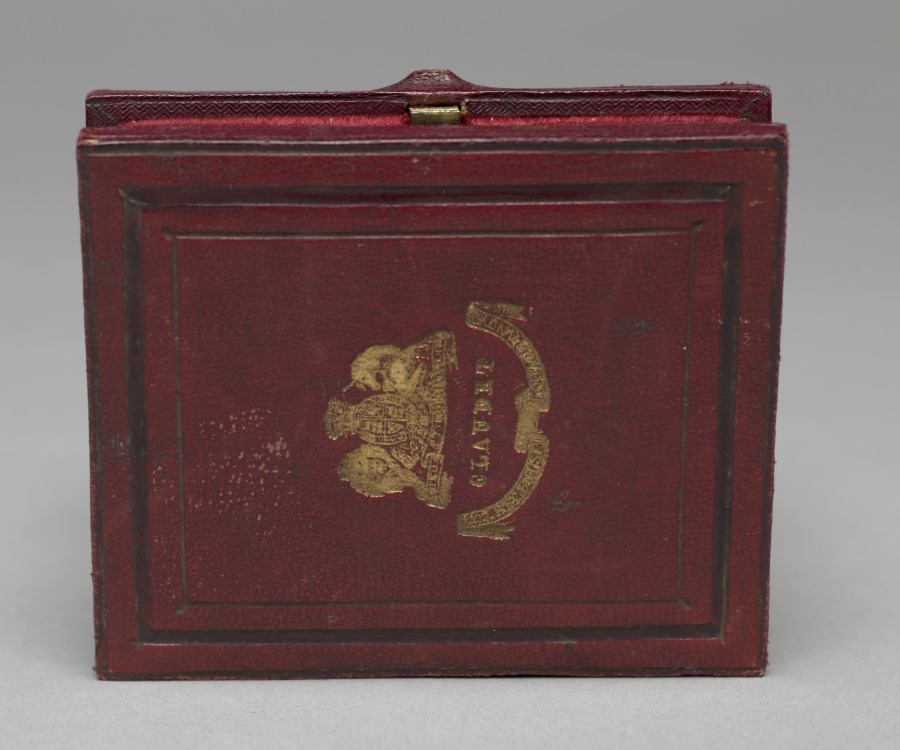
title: High-born lady in white bonnet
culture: France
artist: Antoine Claudet (French, 1797–1867)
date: c. 1855–58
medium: daguerreotype, tinted, sixth plate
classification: Photograph